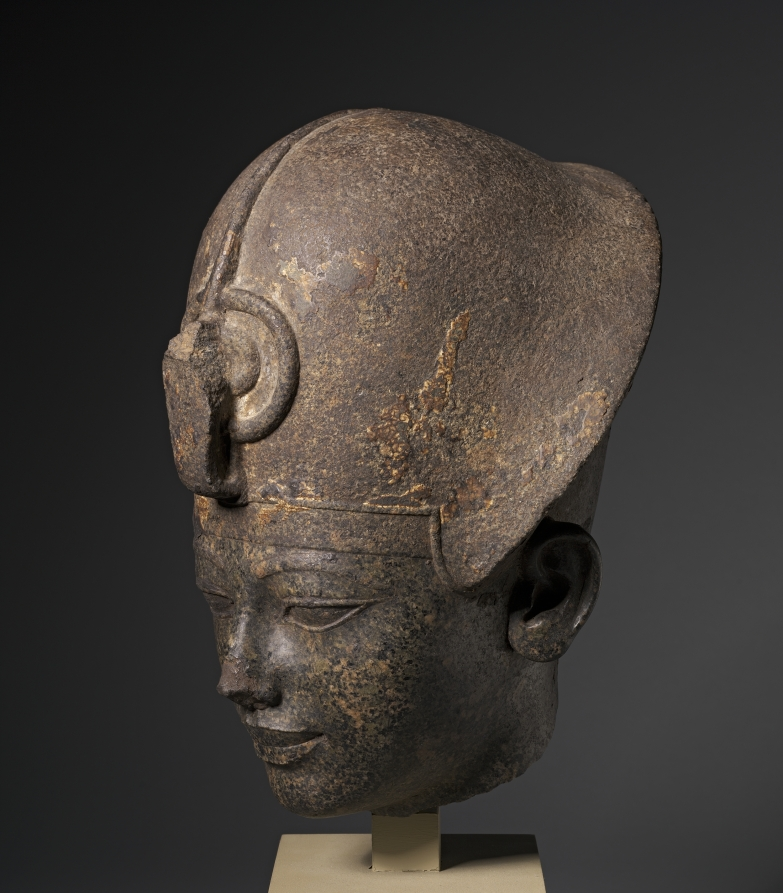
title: Head of Amenhotep III Wearing the Blue Crown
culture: Egypt, New Kingdom (1540–1069 BCE), Dynasty 18, reign of Amenhotep III (1390–1352 BCE)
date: c. 1391–1353 BCE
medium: granodiorite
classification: Sculpture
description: During the long, peaceful reign of Amenhotep III, Egypt reached a pinnacle of wealth and splendor. This magnificent portrait captures the ruler's exotic features to perfection. He has large, almond-shaped eyes, elegant arched eyebrows, and a full mouth. His face is youthful and without blemish. The bone structure is lost in the fleshy fullness of the face. The contrast between polished and roughened surfaces is a hallmark of hard stone images of Amenhotep III. The flesh areas were smoothed to a glistening sheen, while the eyeballs and the crown were left rougher. The roughening of the crown also had a practical purpose, for the upper portion was originally painted blue and the browband was painted yellow. The paint would have adhered better to the unpolished surface.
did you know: The Blue Crown or Khepresh was worn by New Kingdom Pharaohs into battle as well as in ceremonies.